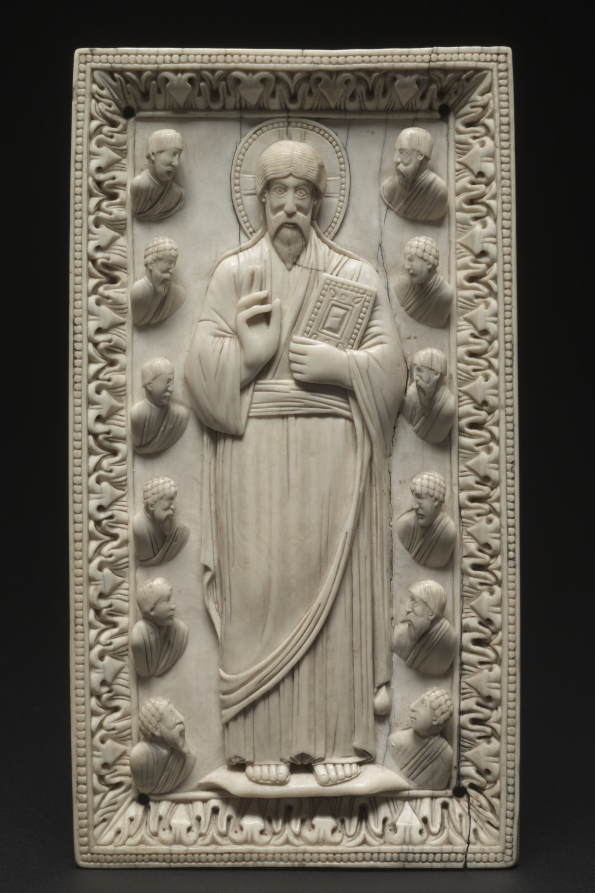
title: Christ's Mission to the Apostles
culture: Ottonian, Italy, Milan, Gothic period, 10th century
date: c. 970–980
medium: ivory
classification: Ivory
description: This ivory plaque represents a full-length figure of Christ flanked by bust-length portraits of the twelve apostles, six in a vertical column on each side. With his large eyes fixed on the beholder and his mouth slightly open, Christ seems about to speak to the apostles, charging them with the mission of preaching the Gospel to the world. The plaque may originally have formed the central decoration of a precious Gospel book cover that may have looked much like the one Christ carries in this image.